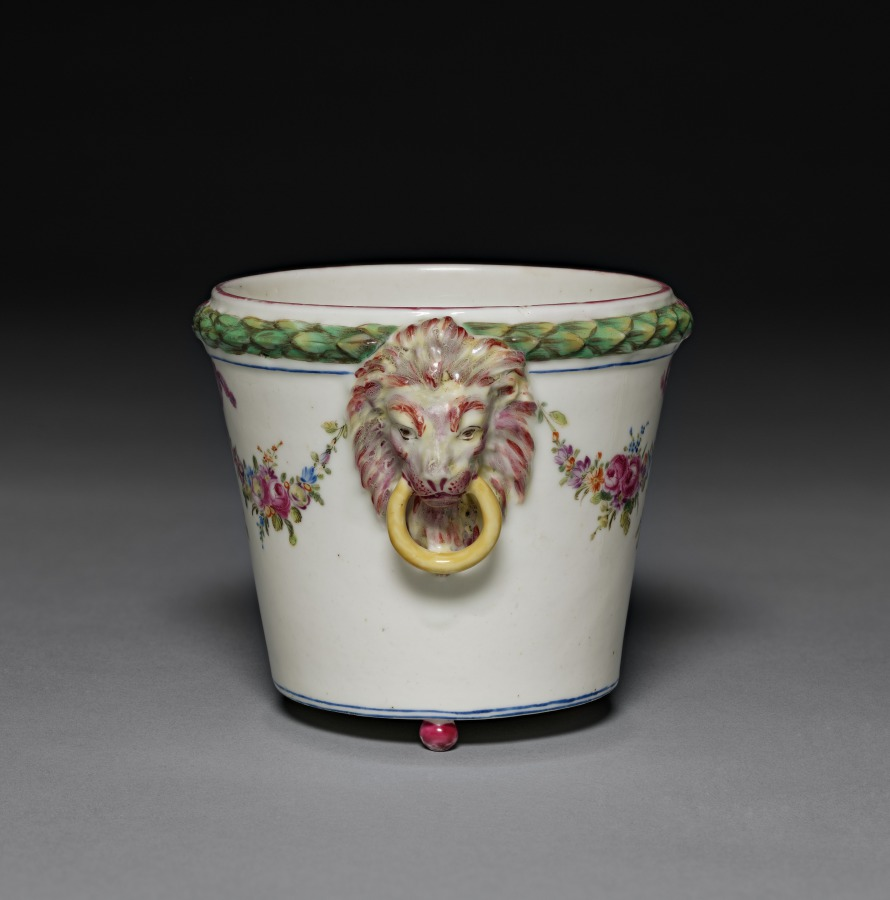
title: Cachepot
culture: France, Bourg-la-Reine, 18th century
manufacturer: Bourg-la-Reine Factory (French)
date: c. 1775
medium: soft-paste porcelain with enamel decoration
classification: Ceramic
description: The mark on this piece indicates that it was made after the Mennecy factory was moved to Bourg-la- Reine in 1773. The tradition of Mennecy's decoration on soft-paste porcelain can be recognized in the piece, but its style has been modified in response to the emerging neo-classic taste. The flowers are now organized into formal garland's and motifs of classical origin, such as the lion's heads, are introduced.